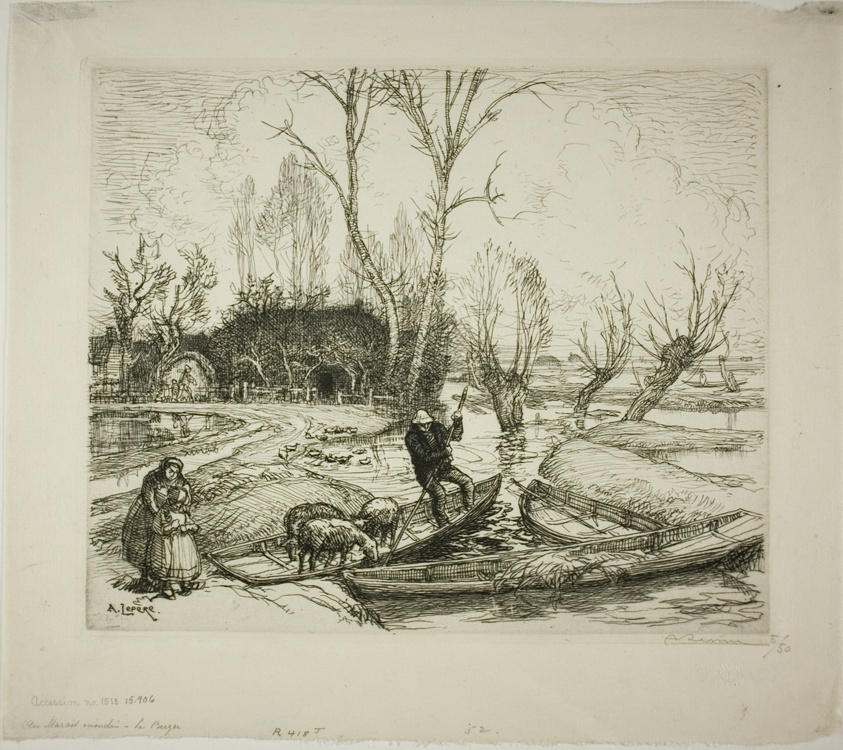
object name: Print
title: The Flooded Marais: The Shepherd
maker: Louis Auguste Lepère (French, 1849-1918)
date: 1911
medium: Etching on cream laid Japanese paper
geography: France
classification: etching; print; prints and drawing